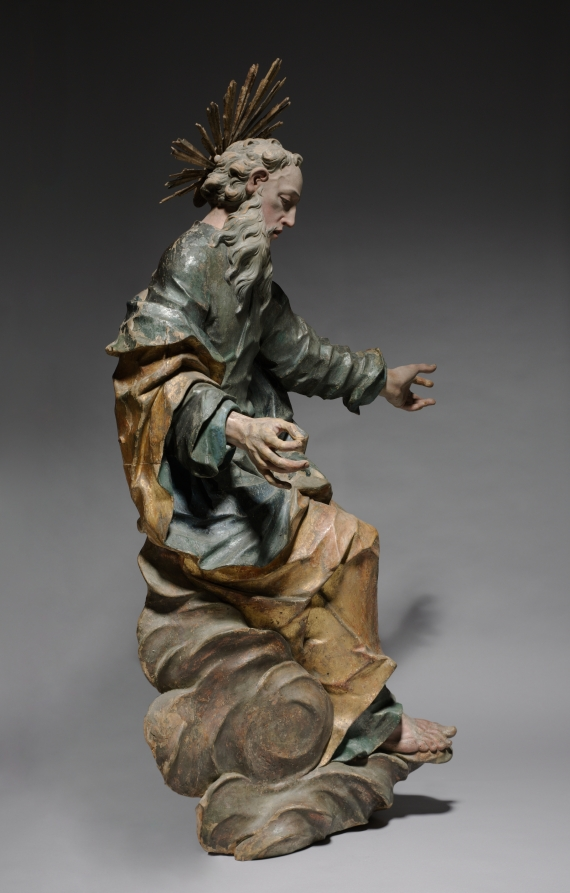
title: God the Father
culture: Austria, Lambach, 18th century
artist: Johann Peter Schwanthaler (Austrian, 1720–1795)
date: c. 1760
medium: painted and gilded wood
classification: Sculpture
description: Johann Peter Schwanthaler belonged to a renowned family of sculptors that produced works for religious and domestic settings throughout Bavaria, Austria, and southern Germany for more than 250 years. This imposing image of God the Father would have formed part of a larger group, probably at the top of an altar. The figure displays the characteristic features of Schwanthaler’s style, such as the elongated figural proportions, sharp-edged drapery folds, and the beautifully expressive, anatomically detailed hands.